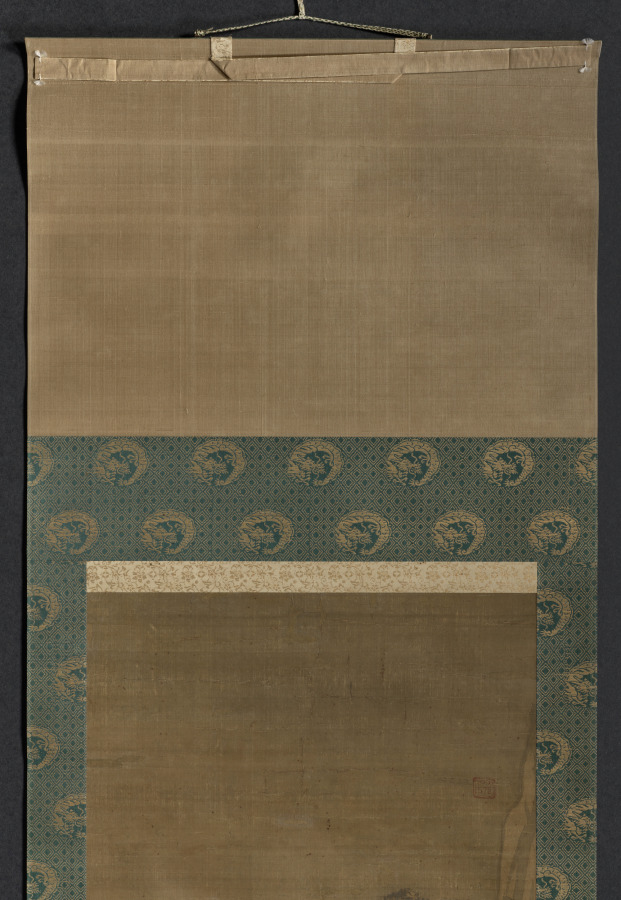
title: Bodhidharma Meditating Facing a Cliff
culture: China, Song dynasty (960-1279)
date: late 1200s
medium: Hanging scroll; ink on silk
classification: Painting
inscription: Spurious artist's seal of Yan Ciping 閻次平 [c. 1163–1189]. WKH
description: Bodhidharma is the legendary founder of Chan (Zen) Buddhism in China. Here he is seen meditating in front of a cliff, atop Mount Song. Behind him is his disciple Huike, the first recipient of his teaching.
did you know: Rough and calligraphic brushwork for landscape and drapery contrasts with more psychologically penetrating representation of the two protagonists' faces.